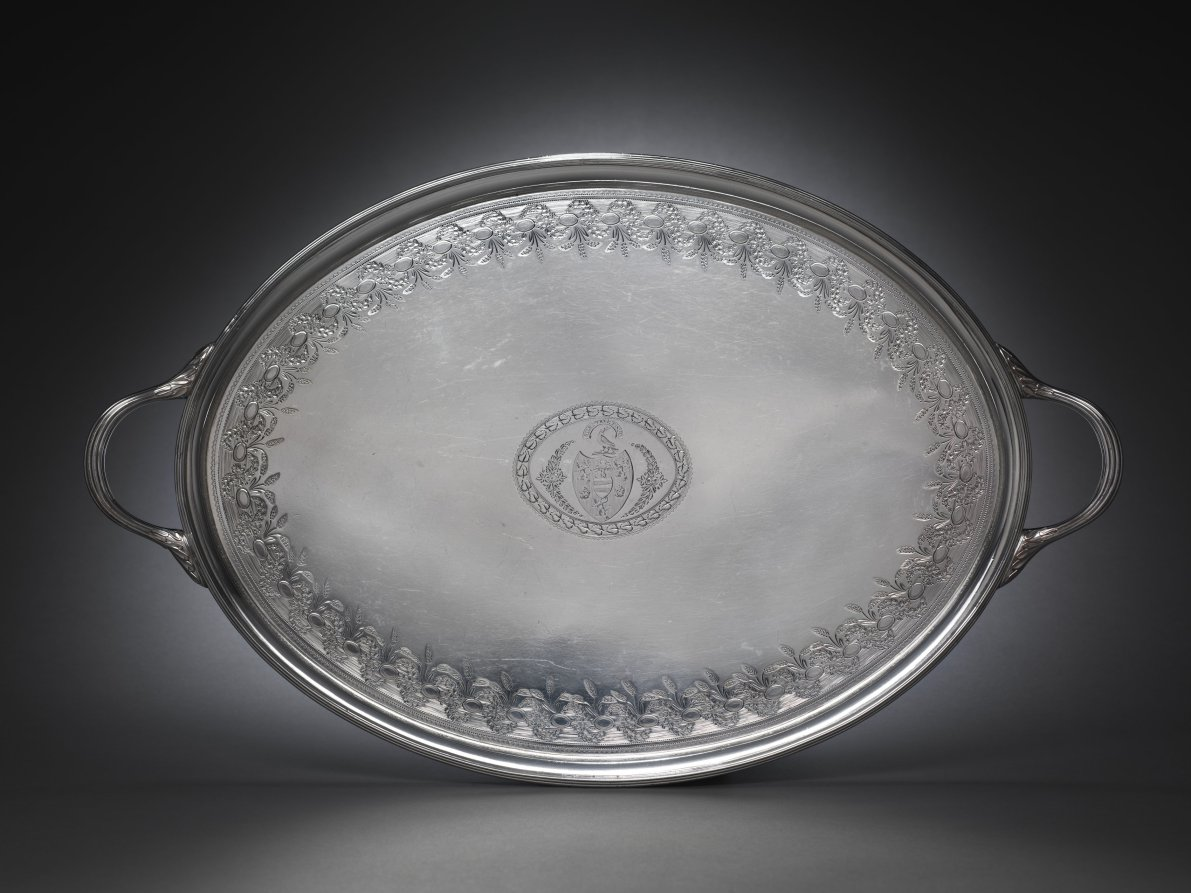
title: Tea Service (Tray)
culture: London, England, early 19th century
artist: Anne Bateman (British, 1748–1813)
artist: Peter Bateman (British, 1740–1825)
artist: William (I) Bateman (British, 1774–1850)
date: c. 1790–1810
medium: silver on copper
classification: Silver